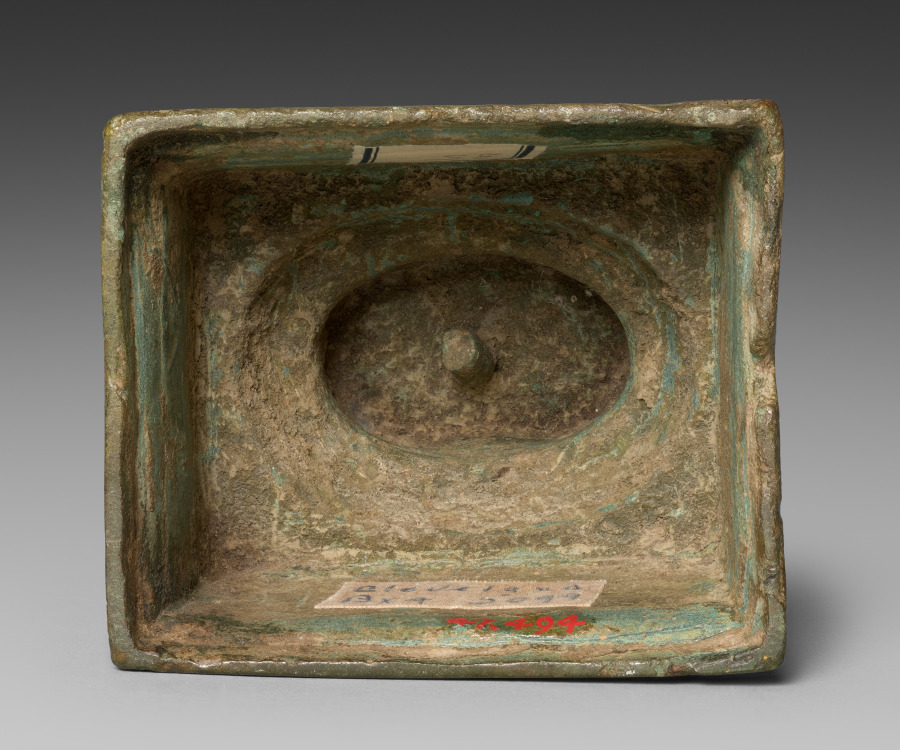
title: Vajrasattva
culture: Cambodia, style of Angkor Thom, 12th-13th century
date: 1100s–1200s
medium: bronze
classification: Sculpture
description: Vajrasattva is a Buddhist being of enlightenment who holds the vajra, or thunderbolt, in his right hand and a bell in his left. The vajra and bell are the basic implements used in tantric rituals that were popular under Jayavarman VII and practiced at Banteay Chhmar. Tantra is a form of Buddhism that makes use of rituals and mantras to aid practitioners in reaching their goals quickly, as though with the speed of lightning. Tantric texts and rituals were used frequently in Cambodia, from the 900s onward, but they were especially prominent under Jayavarman VII. This form of Buddhism appears to have been supplanted by other forms after the 1400s. Small bronze images of Vajrasattva may have been brought out from a temple treasury during the performance of Buddhist rituals that followed the instructions in a Sanskrit text, brought to Cambodia from India, called the Hevajra-tantra. In that text Vajrasattva manifests at key moments in the rituals.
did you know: From the back of the crown hang cords, which drape over the shoulders. The same type of cords hang from the back of the belt, coiling over the legs symmetrically on either side.